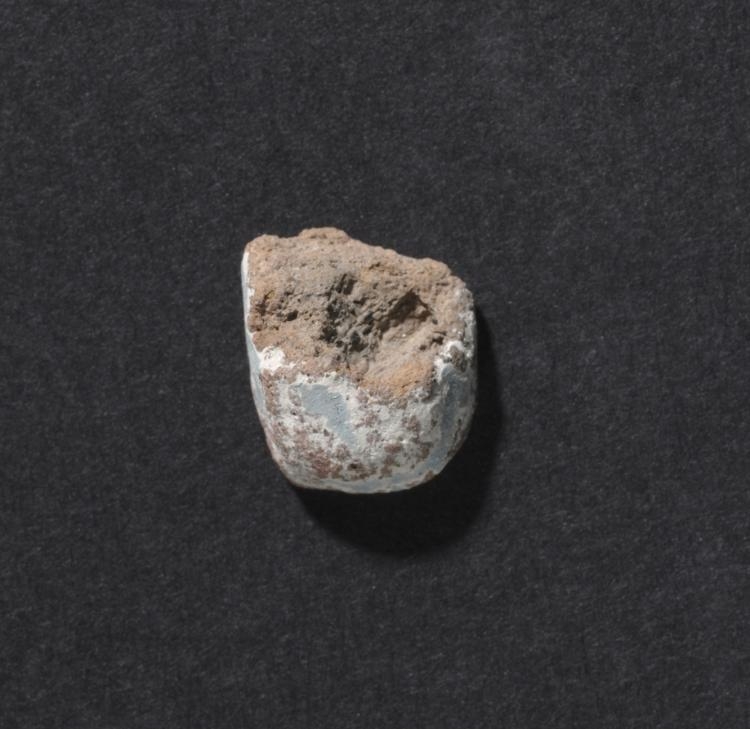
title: Shawabty of Ditamenpaankh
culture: Egypt, Late period (715–332 BCE), Dynasty 25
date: 715–656 BCE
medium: terracotta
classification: Funerary Equipment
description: High demand for shawabtys in the Late Period, a time when as many as 400 or more shawabtys were placed in the tomb with the deceased, gave rise to a specialized container for storing them: the shawabty box. This example is inscribed for the lady of the house, Ditamenpaankh, and was probably one of a pair originally made for her. The single-masted boat on the box's lid is perhaps an allusion to the pilgrimage of the deceased to the holy city of Abydos, the cult city of Osiris, king of the dead. The shawabtys inside are crude, mass-produced examples cast in an open mold. Made of terracotta, their blue paint imitates more costly shawabtys made of faience. As for the shawabty spell, it has been removed from its traditional location on the shawabty's front and relocated onto the sides of box, where it needed only to be written once, thus expediting production.